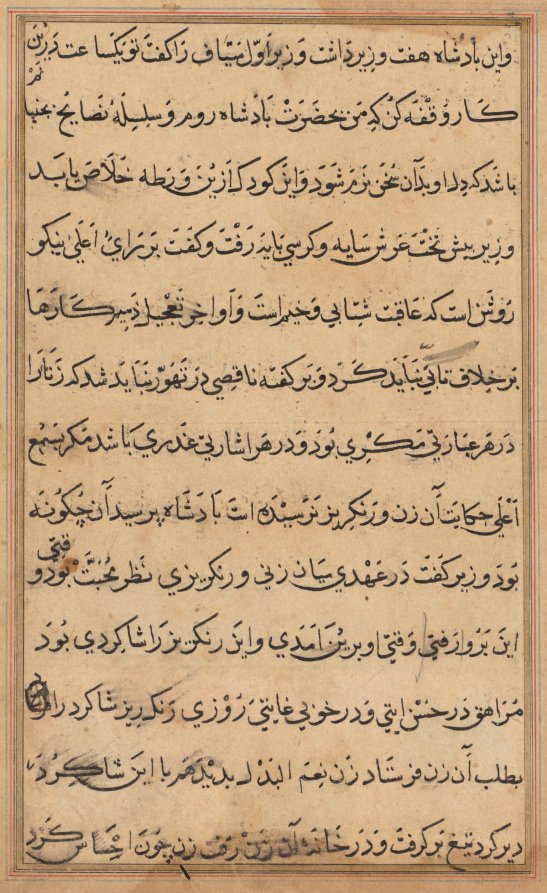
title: Page from Tales of a Parrot (Tuti-nama): text page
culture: Mughal India, court of Akbar (reigned 1556–1605)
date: c. 1560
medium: gum tempera, ink, and gold on paper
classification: Painting